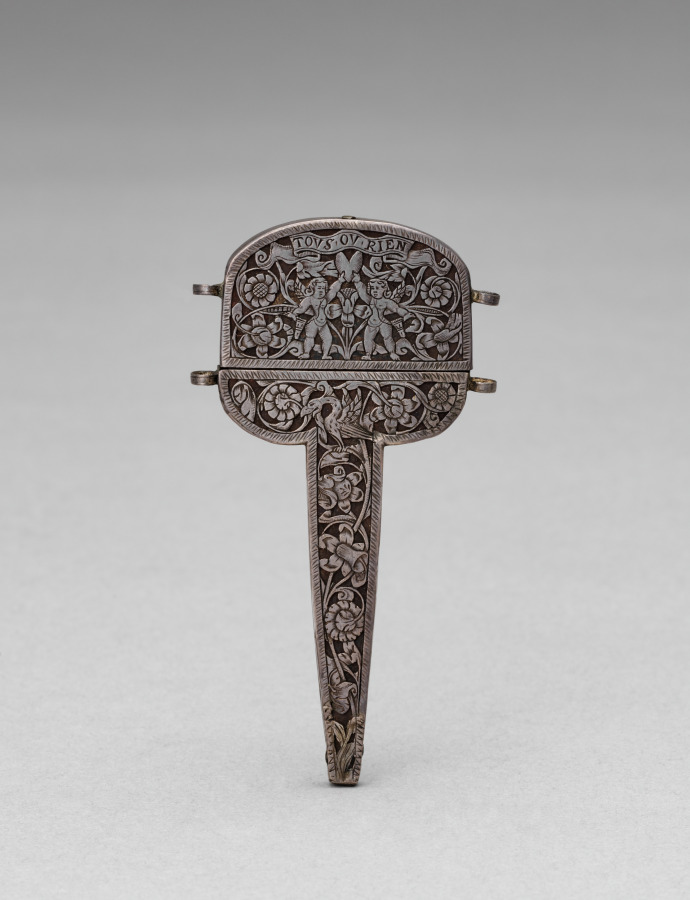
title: Scissors Case (Etui)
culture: The Netherlands or France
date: c.1690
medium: silver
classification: Silver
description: Attached to a belt loop, silver scissor cases were practical fashion accessories. Intricately designed and expensively produced, they demonstrated the wealth of a wearer. Cases like this one were often decorated with motifs of love and given as traditional wedding or engagement gifts. On one side of this case, two putti raise a heart above their heads, on the other they defend it with a pair of crossed spears.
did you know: The inscription on this scissor box reads “TOVS. OV. RIEN” (all or nothing) on one side and “IE. PERIRAI. PLVSTOS” (I would rather die) on the other.